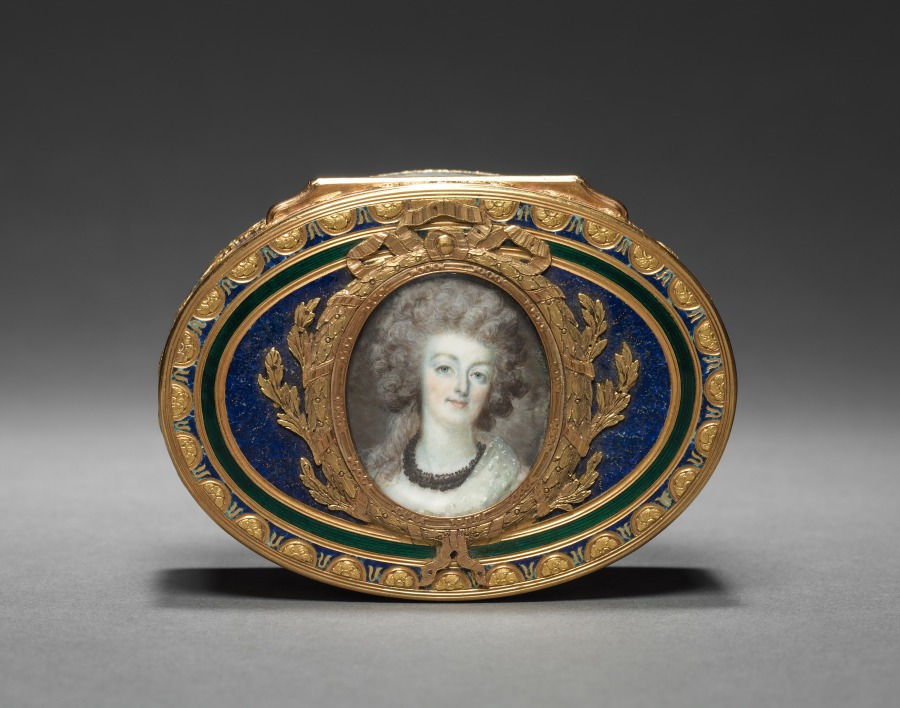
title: Snuff Box (Tabatière) with Portrait of Marie Antoinette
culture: France, 18th century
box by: Pierre-François-Mathis de Beaulieu (French)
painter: François Dumont (French, 1751–1831)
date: 1768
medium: watercolor on ivory in a gold and enamel box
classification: Enamel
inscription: [Maker's mark of Pierre-François-Mathis de Beaulieu, master goldsmith in 1768, inside cover]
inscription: [Charge mark of Jean-Jacques Prévot, 1762-1768, inside cover]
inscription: [Warden's mark of Paris, 1768-1769, inside cover]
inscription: [Discharge mark of Julien Alaterre, Paris, 1768-1774, on neck at right]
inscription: [Inside box, the letter]: "F"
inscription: [On bezel at left, engraved number]: "627"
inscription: [On front of bezel, engraved signature]: "Ve Georges Beaulieu à Paris"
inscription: [On right of miniature portrait, the letter]: "D"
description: This box was created through the collaboration of two skilled and well-known artisans of the period, master goldsmith Pierre-François-Mathis de Beaulieu and celebrated miniature painter François Dumont. The portrait of Marie Antoinette on the box's lid is painted in Dumont’s own style while those on the sides and bottom of the box take inspiration from the work of painter François Boucher, known for his pastoral scenes in the Rococo style.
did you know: Marie Antoinette, queen consort of French King Louis XVI and great patron of the decorative arts, was executed in 1793 at the end of the French Revolution.